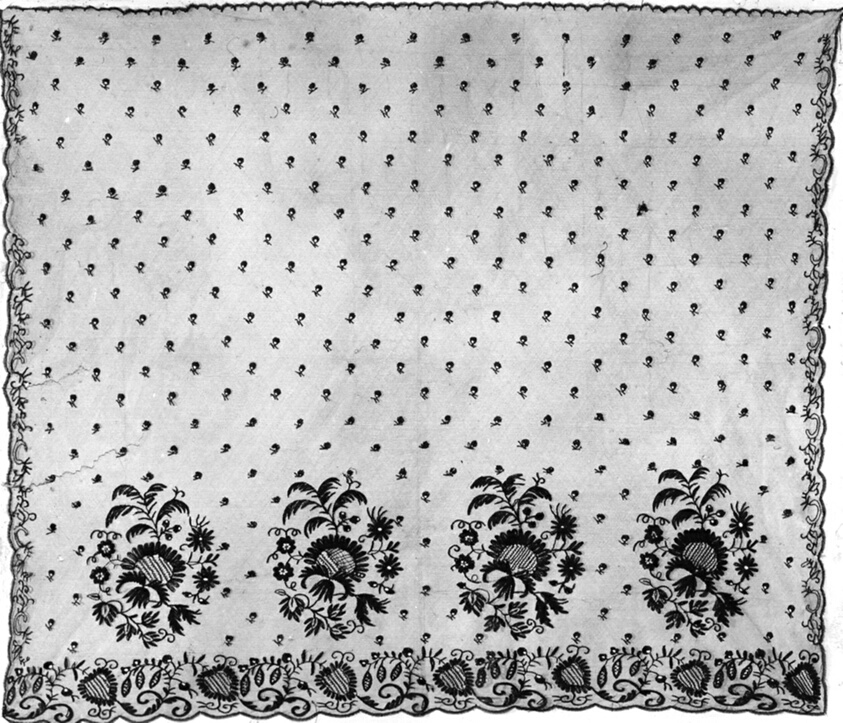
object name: Textile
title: Bonnet Veil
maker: England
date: 1825/35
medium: Silk, machine-made twist net; embroidered in chain stitches (tambour work); edged in machine-made picots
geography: England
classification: textile; lace - mixed